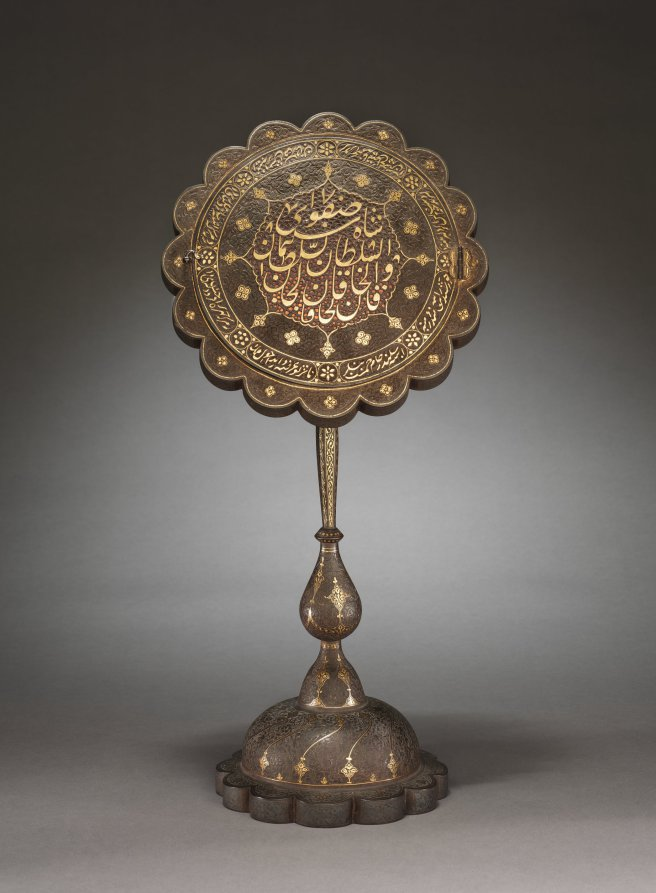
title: Mirror Stand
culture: Iran, Qajar period (1779-1925)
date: 1800s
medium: Steel engraved and inlaid with gold and silver with openwork calligraphic design on hinged door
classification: Metalwork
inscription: Selection from the inscriptions in the surrounding ring: نه هر که چهره برافروخت دلبری داند. نه هر که آینه سازد سکندری داند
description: The mirror was both a courtly accouterment and a popular poetic device in Persian literature. The central circular panel has a hinge and hook that opens to reveal the mirror. The texts in the ring are verses by different authors referring to mirrors. One says: Have they placed a mirror facing the sun at the door of that tent, Or is it the light rays shining from the forehead? Such mirrors were popular during the Qajar period (1779–1925), but this example evokes the grandeur of the earlier Safavid period by inscribing in the center the name of Shah Sulayman (1648–1694) who, fittingly, spent most of his 28-year reign with women in the harem, where such mirrors would have been used.